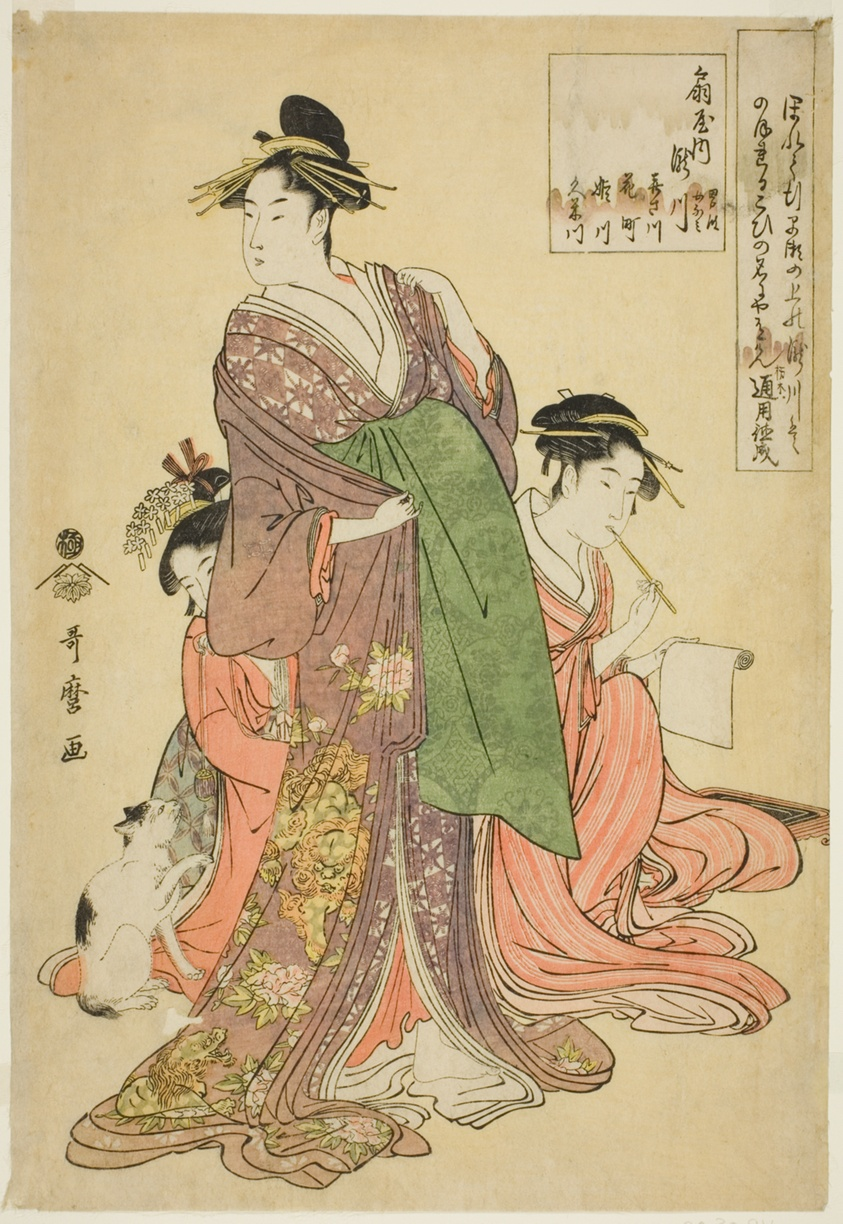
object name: Print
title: Takigawa of the Ogiya (Ogiya uchi Takigawa, Onami, Menami, Kisagawa, Hanamichi, Himekawa, Kumegawa)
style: Japanese (culture or style)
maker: Kitagawa Utamaro 喜多川 歌麿; Japanese, 1753 (?)-1806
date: 1793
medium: Color woodblock print; oban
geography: Japan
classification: woodblock print; print; asian art